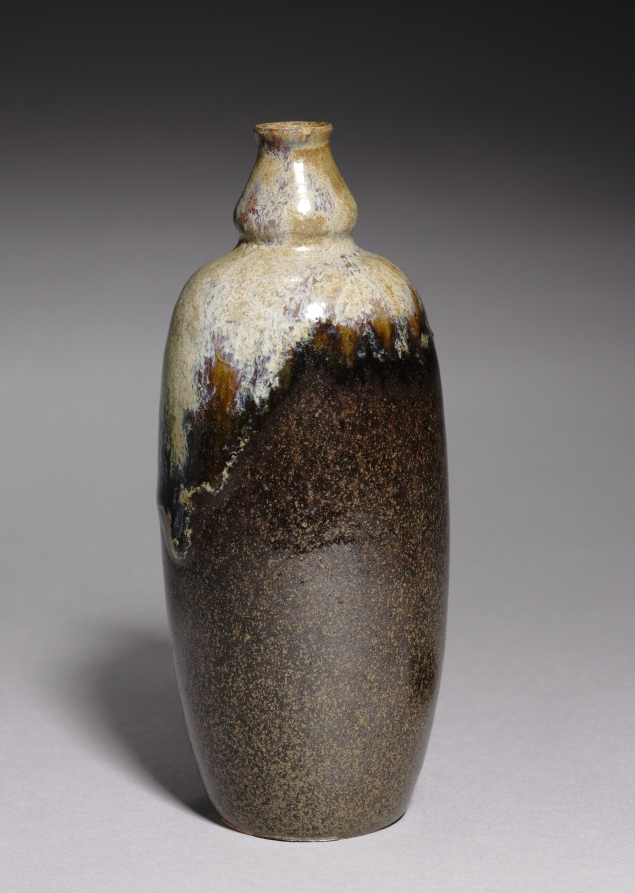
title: Vase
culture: France, early 20th Century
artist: Auguste Delaherche (French, 1857–1940)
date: c. 1910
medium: stoneware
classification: Ceramic